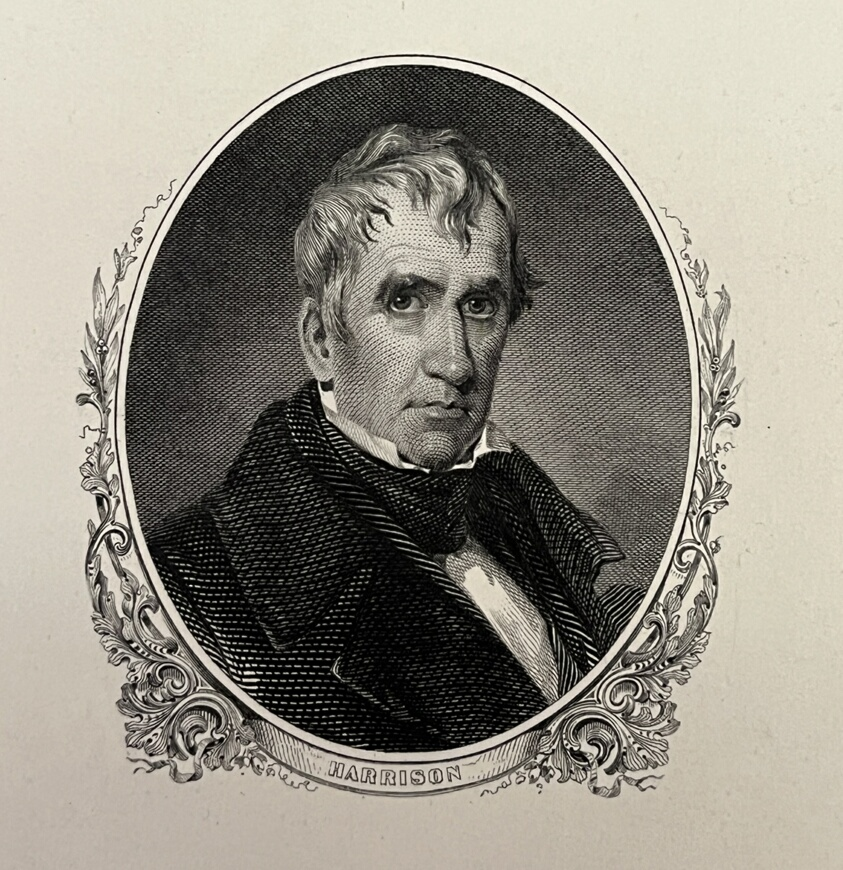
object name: Print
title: Harrison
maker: Artist Unknown (Likely American, 19th century)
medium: Etching on paper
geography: United States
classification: reproduction; print; prints and drawing